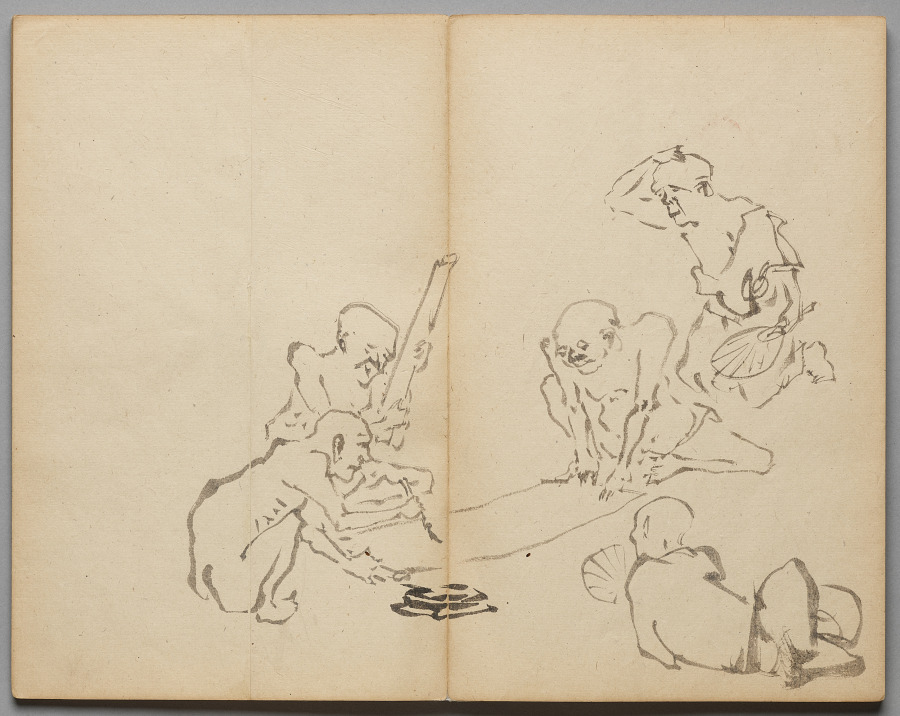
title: Calligraphy in the Heat from Sketch Album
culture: Japan, Edo period (1615–1868) to Meiji period (1868–1912)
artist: Kawanabe Kyōsai (Japanese, 1831–1889)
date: mid- to late 1800s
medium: Accordion-style book of 26 double-leaves; ink and color on paper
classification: Bound Volume